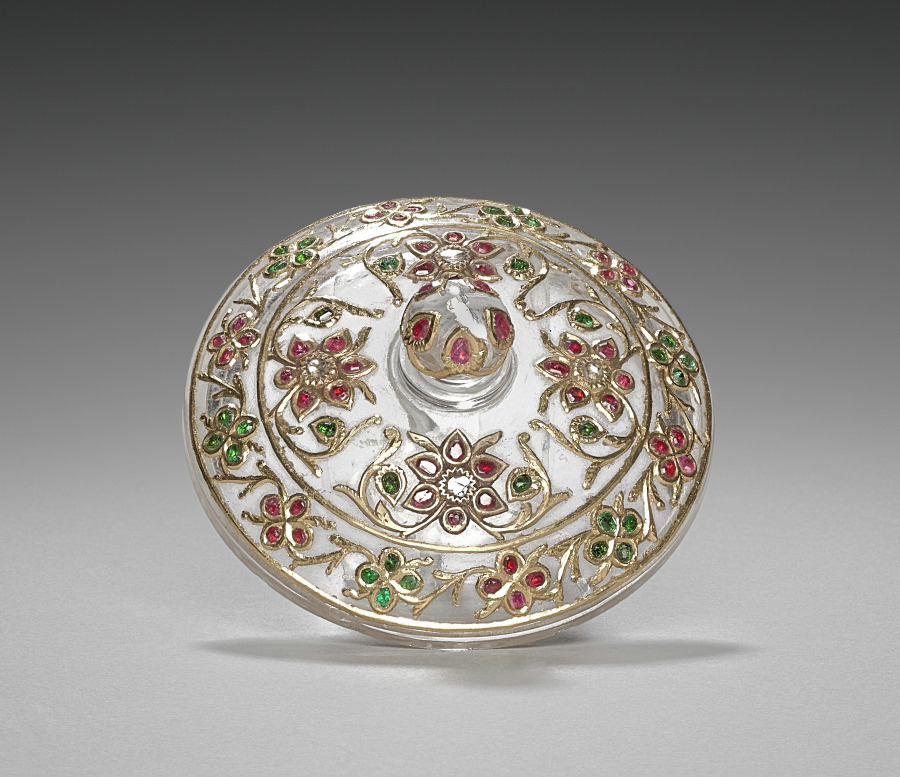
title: Jar with Cover (lid)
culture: India, Jeypore, Moghul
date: 18th Century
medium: crystal set with gold and jewels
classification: Jewelry